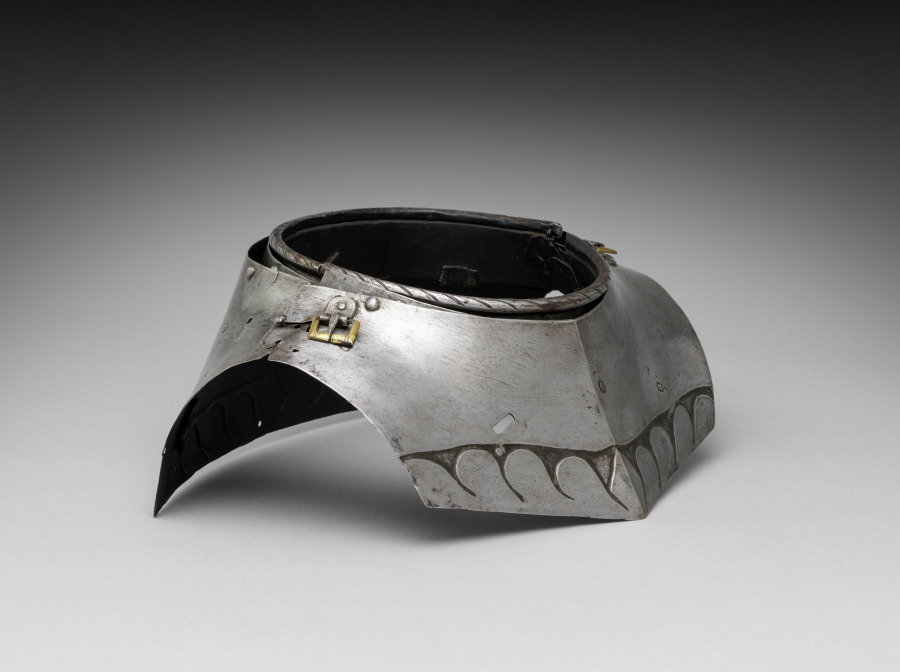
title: Gorget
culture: Germany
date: 1500s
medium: steel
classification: Arms and Armor